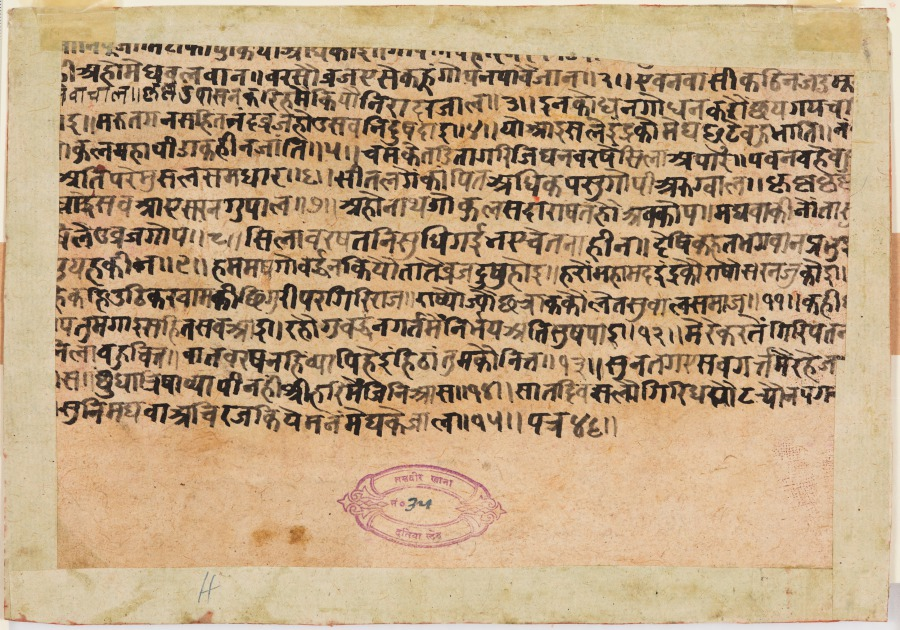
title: Krishna Lifts Mount Govardhan, from a Bhagavata Purana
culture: Central India, Madhya Pradesh, Malwa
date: 1686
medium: Gum tempera on paper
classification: Painting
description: After Krishna convinced the dwellers of the cowherd village in Braj to not give the annual offering to Indra, king of the gods, an enraged Indra flooded the village with heavy rainfall. Krishna, shown with four arms, lifted nearby Mount Govardhan, and the villagers took shelter underneath. The painting depicts a heavy torrent of rain, and in the upper left, Indra sits enthroned with two attendants and his white elephant mount.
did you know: The “hundred-eyed” Indra wears the garments of a Mughal emperor, with his tunic tied under the right arm.